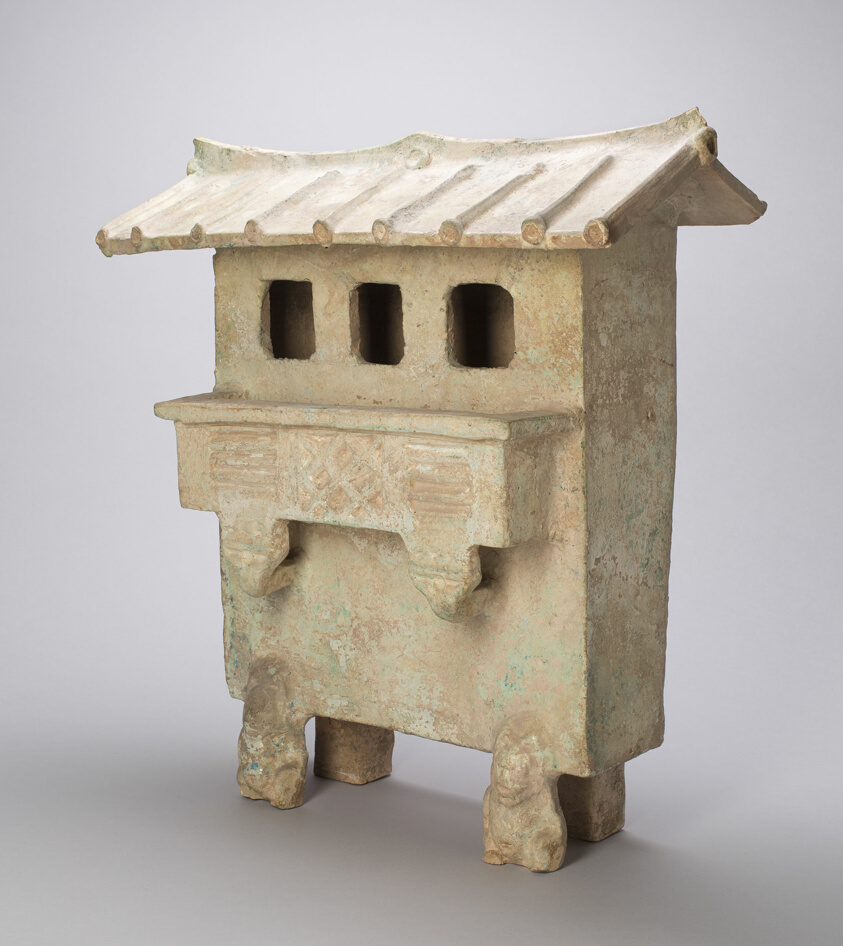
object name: Sculpture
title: Model of a Two-Story Structure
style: Chinese (culture or style)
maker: China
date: Eastern Han dynasty, 25–220 CE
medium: Brick-red earthenware with green lead glaze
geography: China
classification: earthenware; ceramics; sculpture; asian art